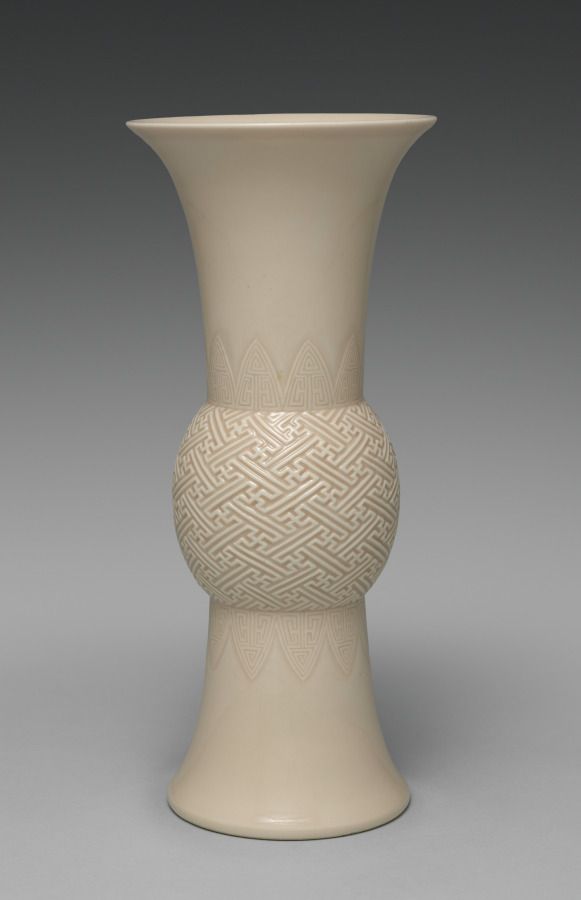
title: Gu-Shaped Flower Vase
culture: Japan, Meiji period (1868–1912)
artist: Seifū Yohei III (Japanese, 1851–1914)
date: 1893–97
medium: Glazed porcelain with molded and carved designs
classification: Ceramic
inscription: 大日本清風造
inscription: This gu-shaped vase has “cherry blossom glaze” (ōkayū), according to the inscription on its box.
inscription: A label affixed to the side of the box gives a sense of how previous owners conceived of the piece. Although the label is partially abraded, one can make out the character nezu 鼠, used in the names of numerous light pinks, from Naniwa pink (Osaka pink) to Miyako pink (Kyoto, or capital, pink). Also legible is the phrase hakugōrai, a broad term that can describe a shade of white associated with ceramics discovered in Korean tombs, but often applied to other ceramics of similar coloration, many from Chinese kilns, including Ding (J. Tei) ware of the Northern Song dynasty.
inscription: 清風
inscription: 帝室技芸員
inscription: 清風與平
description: Seifū Yohei III was the most prominent head of a ceramics studio in Kyoto that specialized in Chinese-style porcelains and especially items for use in sencha (煎茶), or the drinking of steeped-leaf tea with companions. Sencha was popular among the bunjin of Kyoto and Osaka, who often enjoyed it as part of their emulation of Chinese culture. While sencha was by design less formal than the Japanese tea ceremony, it still featured the display of treasured objects. Prized Chinese antiquities were generally unobtainable, so substitutes such as the Gu-Shaped Flower Vase were much in demand.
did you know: This gu-shaped vase has “cherry blossom glaze” (ōkayū), which Yohei III invented in 1890.